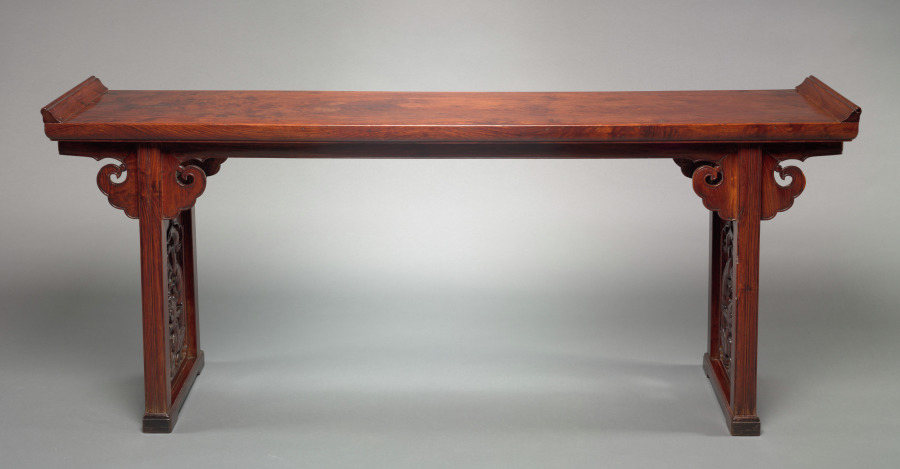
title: Side Table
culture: China, Ming dynasty (1368-1644) or Qing dynasty (1644-1911)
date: 1600s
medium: Rosewood (huanghuali)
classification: Furniture and woodwork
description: Long, rectangular tables were often placed against a wall to hold candlestands, flower vases, or incense burners. It was customary to hang ancestor portraits, images of religious figures, or seasonal paintings above the table that would convey auspicious wishes and blessings to the family. The high legs show stylized cloud-shaped spandrels. At each end of the table, between the recessed legs, are carved openwork panels with a lively dragon motif.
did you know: The table top is made of a single plank of wood.